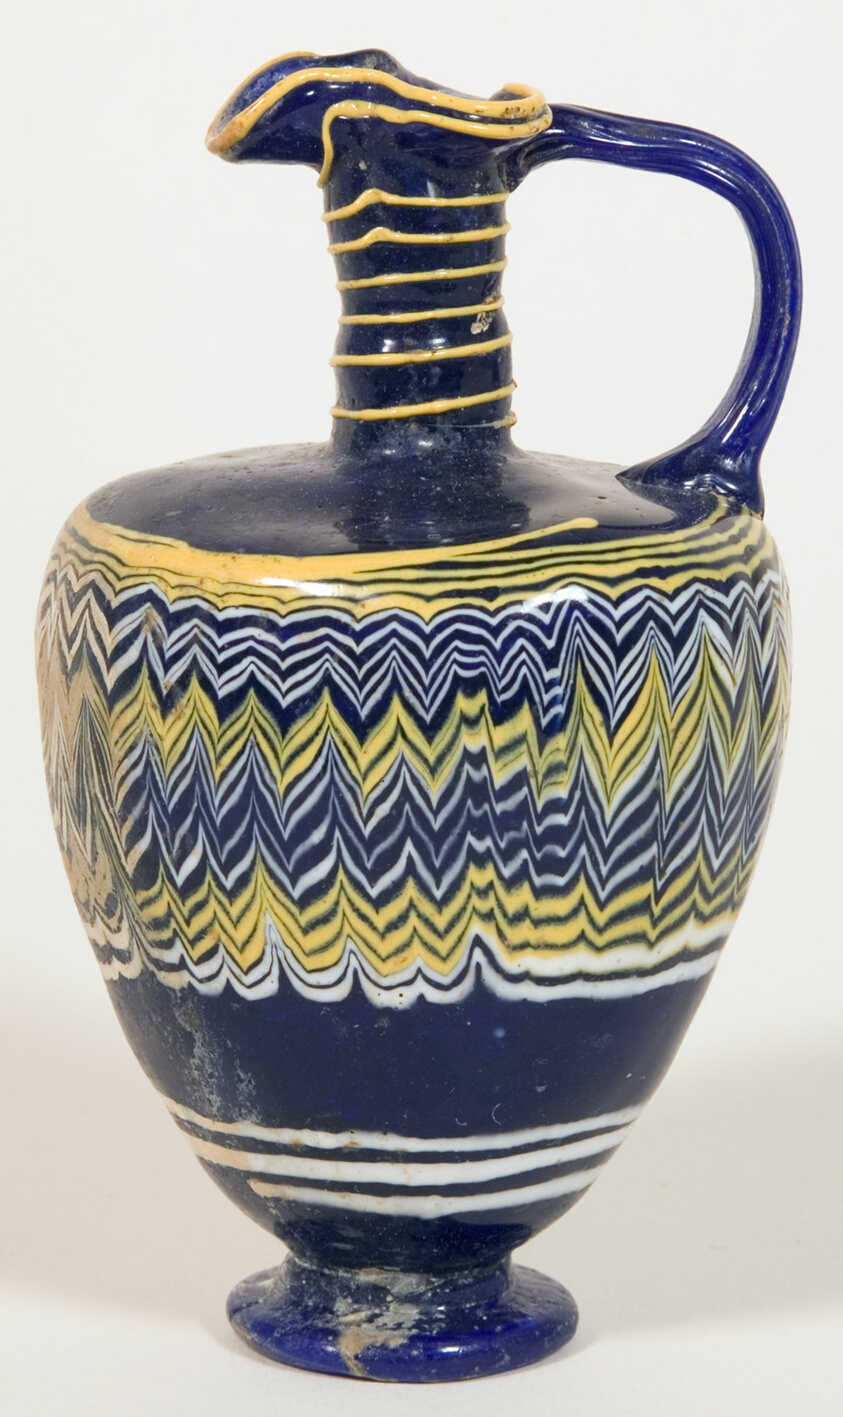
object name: Vessel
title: Oinochoe (Pitcher)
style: late period (egyptian)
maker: Eastern Mediterranean or Italian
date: mid–4th-early 3rd century BCE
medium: Glass, core-formed technique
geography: Eastern Mediterranean Region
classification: pitcher (vessel); glass; vessel; ancient art